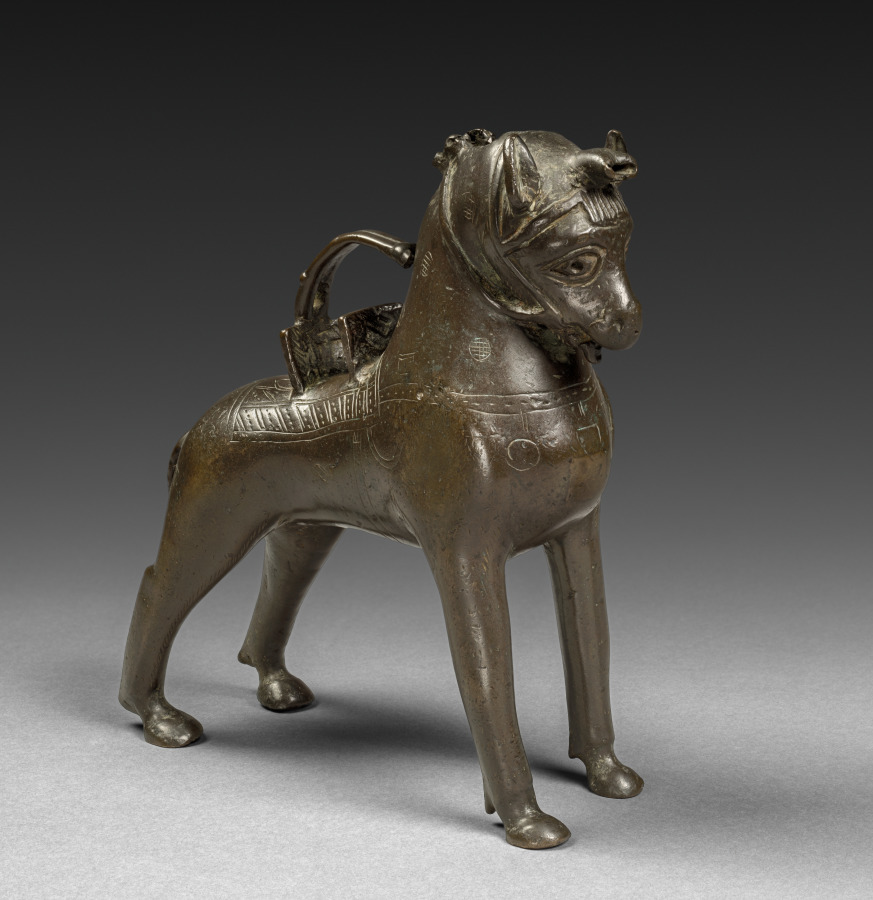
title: Aquamanile: Saddled Horse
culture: North Germany, Lower Saxony (?), 14th century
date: c. 1250–1300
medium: copper alloy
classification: Sculpture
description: Aquamanilia, from the Latin aqua meaning water and manus meaning hands, were hollow cast vessels used for hand washing. Although originally intended for liturgical use they became a common sight in the homes of the nobility in the 1200s and 1300s. Often filled with scented water, these vessels were used to wash hands just before and after eating a meal. An accompanying catch basin would have caught the water as it was being poured. Here we see a proud and alert dappled gray warhorse, highly prized in the medieval period. The saddled but riderless form is rare; other popular aquamanilia include lions, dragons, griffins, and human heads.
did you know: The pattern of crosshatched circles on the surface suggests that the horse is a dappled gray warhorse, a prized possession in the period.